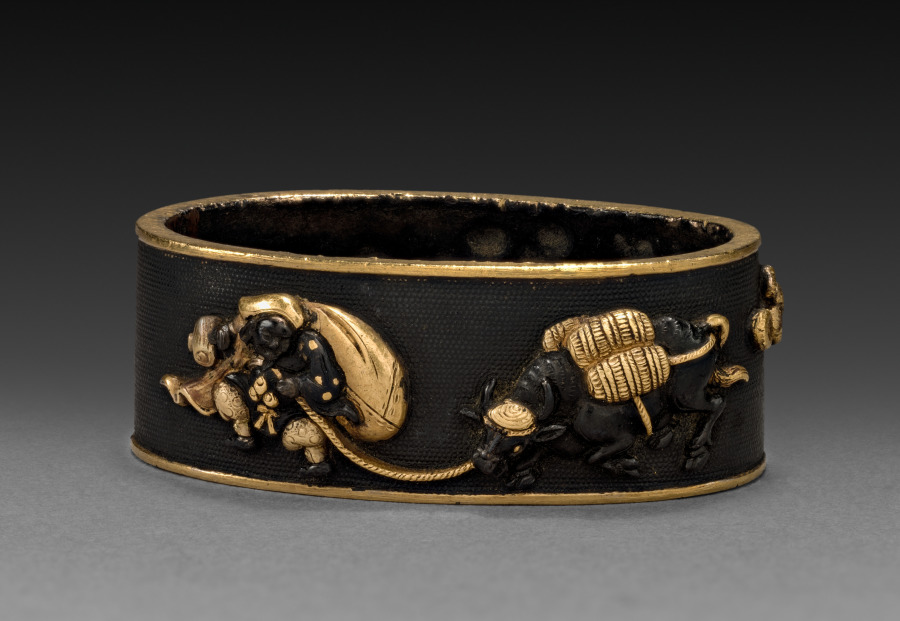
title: Sword-Hilt Collar (Fuchi)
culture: Japan, Edo period (1615–1868)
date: 1700–1850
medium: shakudo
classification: Arms and Armor